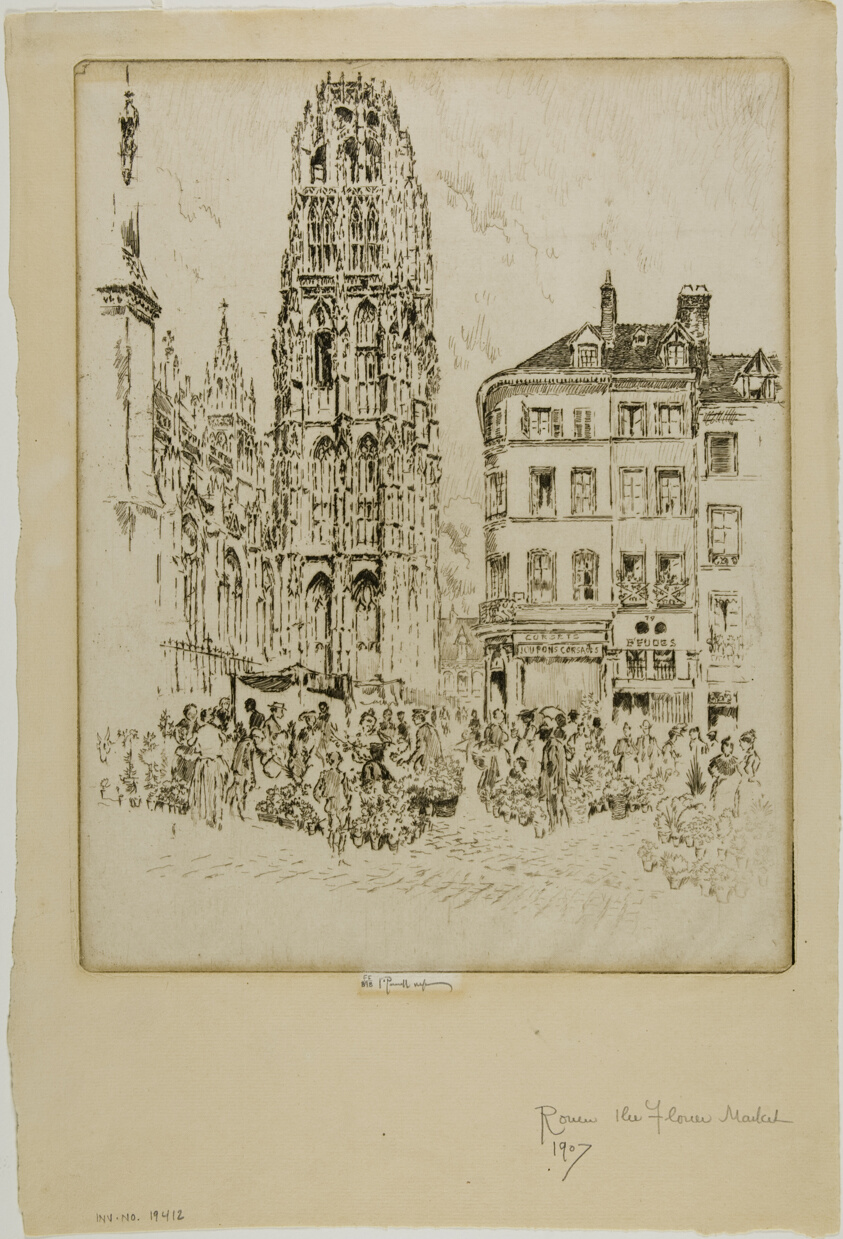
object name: Print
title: Flower Market and Butter Tower, Rouen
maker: Joseph Pennell (American, 1857-1926)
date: 1907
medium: Etching and drypoint on cream laid paper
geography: United States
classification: etching; drypoint; print; prints and drawing